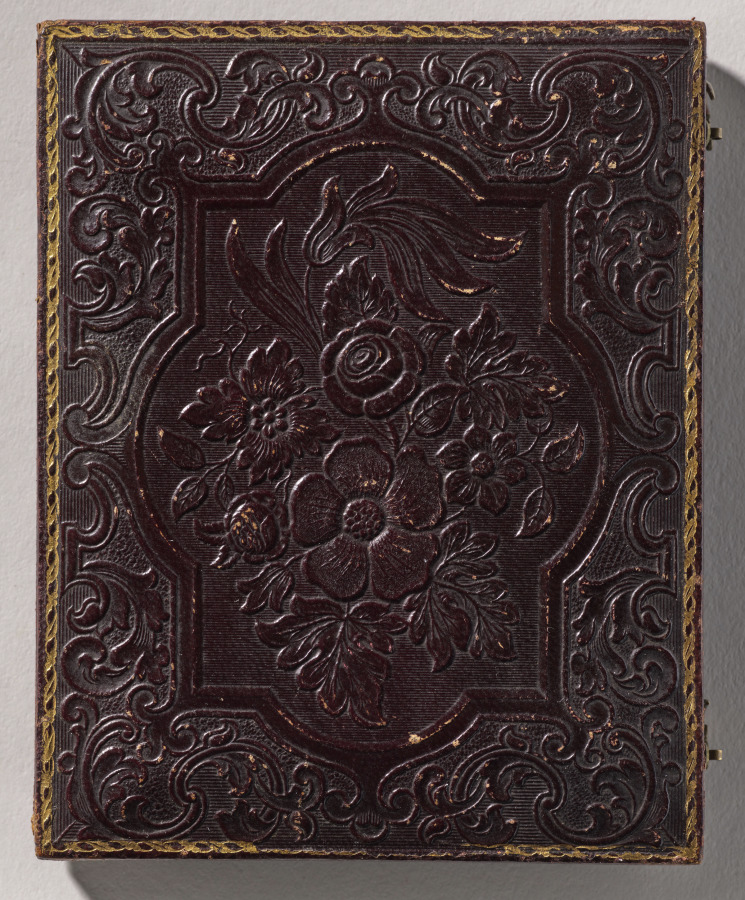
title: Dead Child On a Sofa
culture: America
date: c. 1855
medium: daguerreotype, applied color, quarter-plate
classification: Photograph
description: This carefully staged daguerreotype of a dead child is an outstanding example of a very common subject: the postmortem portrait. Using the stylistic conventions of the day, the unidentified artist successfully created a visually pleasing scene, despite the nature of the image. Dressed in white with a bouquet of flowers on the chest, the child, seen in profile, reclines on an elaborately patterned sofa. Delicate flesh tones were added to the cheek and arm, suggestive of a healthy child sleeping. The high rate of infant mortality throughout the 19th century made this variety of portraiture common, satisfying the emotional need of the parents to have a lasting memory of a loved one.